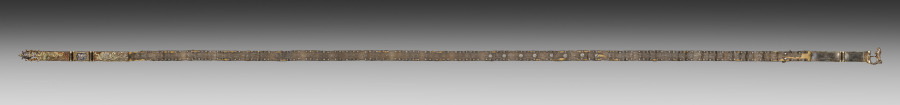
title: Belt for a Lady's Dress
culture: Italy, Siena(?)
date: c. 1375–1400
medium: basse-taille enamel and gilding on silver, silver thread, gilt-silver buckle, cast and chased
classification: Jewelry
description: Because of its extraordinary richness, this belt (also known as a girdle) was both an ornament for the body and an object of great personal luxury. Almost eight feet in length, belts like this were at the height of fashion for both men and women. After being passed around the waist and through the buckle, one end of the belt would fall to the hem of the garment. The belt's many colorful enamel plaques are worked in translucent enamel over decoration engraved into the silver beneath (an enameler's technique known as basse-taille). Within the plaques and cast into the buckle are scenes of courtly love, musicians, and fantastic animals. A large number of translucent enamels were made for secular objects during the late Middle Ages for use on jewelry, cups, garment clasps, and similar objects. This belt is a rare survival among these now scarce objects.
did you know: Look closely at the tiny scenes of courtly love on the plaques that adorn this belt. Given their size, these scenes were designed for the enjoyment of the woman who wore this belt over a sumptuous dress rather than an admirer from a distance.